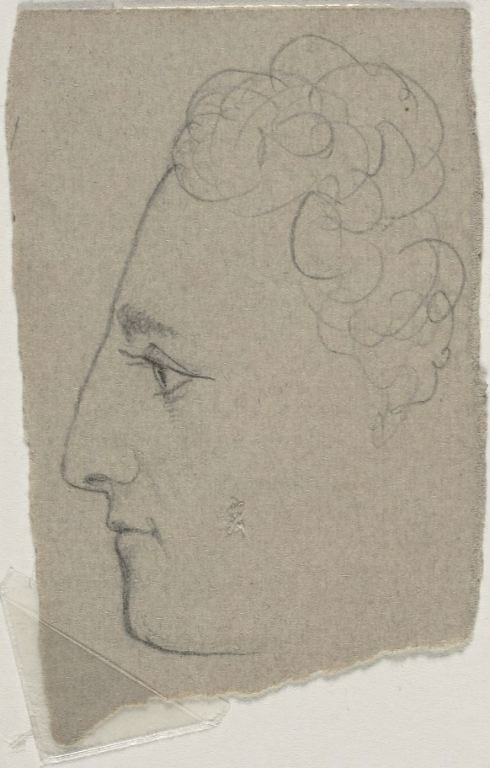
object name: Drawing and Watercolor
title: Profile Sketch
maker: William Michael Harnett (American, born Ireland, 1848-1892)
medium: Graphite on ivory wove card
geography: United States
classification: graphite; drawings (visual works); prints and drawing